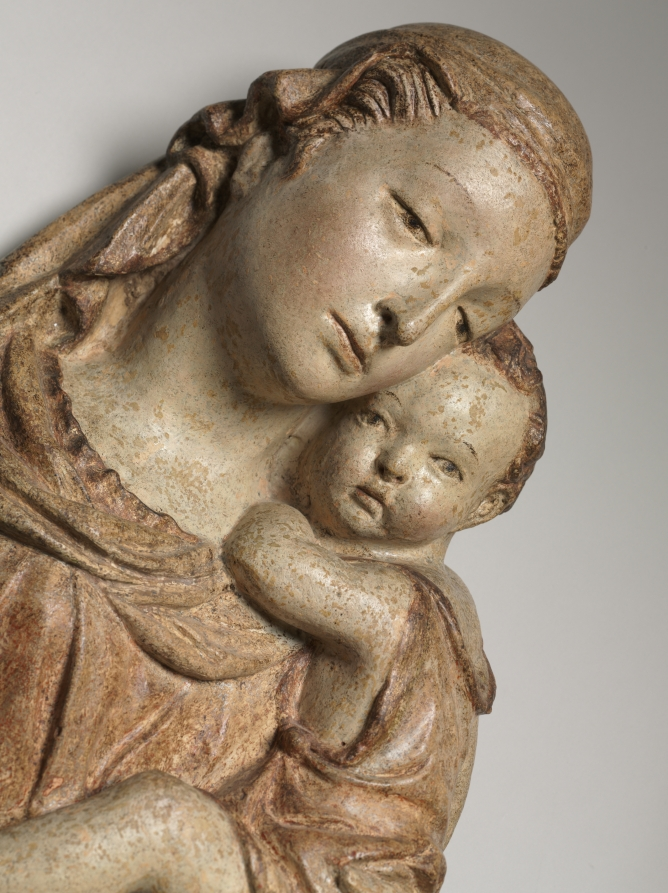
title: Madonna and Child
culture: Italy, Florence, 15th century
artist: circle of Lorenzo Ghiberti (Italian, 1378–1455)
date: c. 1450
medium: polychromed terracotta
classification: Sculpture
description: This half-length Madonna represents one of the finest of about 40 surviving variants, all of which display many characteristics of the Florentine bronze sculptor Lorenzo Ghiberti. These features include serene facial types with narrow eyes and thin eyebrows, the careful arrangement of the Madonna and Child, forehead to cheek, and the infant's twisting pose. The popularity of this devotional relief began around 1420 and continued until around 1500. Ghiberti was the most successful bronze sculptor of the early Renaissance in Florence. His fame rests upon the commissions he received for two sets of bronze doors, completed between 1401 and 1424, for the Baptistry in Florence. The reclining figure of Eve on the base of this Madonna and Child (suggesting Mary as the new Eve) stems from a similar figure on the upper left door of the Porta del Paradiso, the second set of Baptistry doors. Eve's presence on the base clearly substantiates the attribution to Ghiberti and helps date the relief.